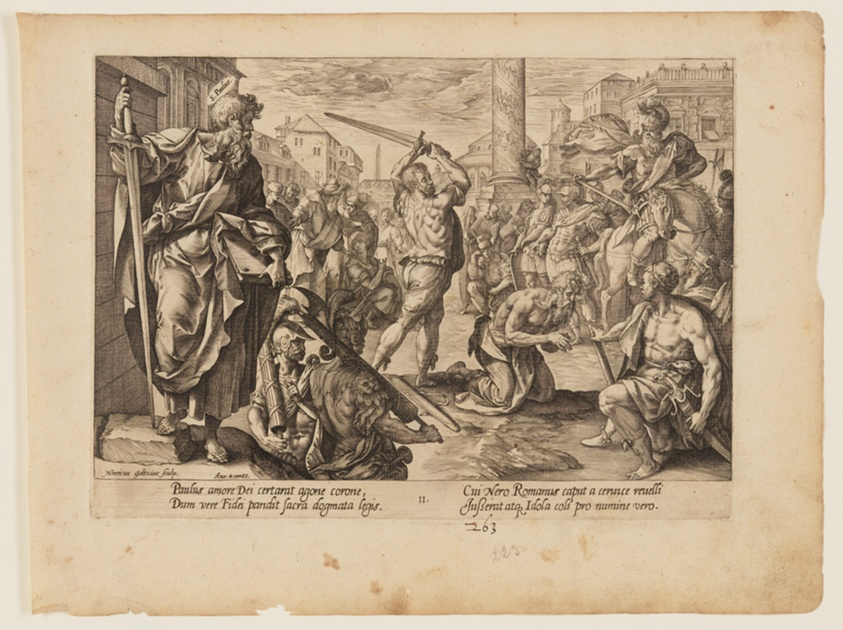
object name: Print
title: The Martyrdom of St Paul, from The Martyrdom of Christ and the Apostles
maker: Hendrick Goltzius (Dutch, 1558–1617); after Maarten de Vos (Flemish, 1532–1603); published Hieronymus Cock (Netherlandish, c. 1510–1570)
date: c. 1578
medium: Engraving on ivory laid paper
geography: Netherlands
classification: engraving; paper; print; prints and drawing